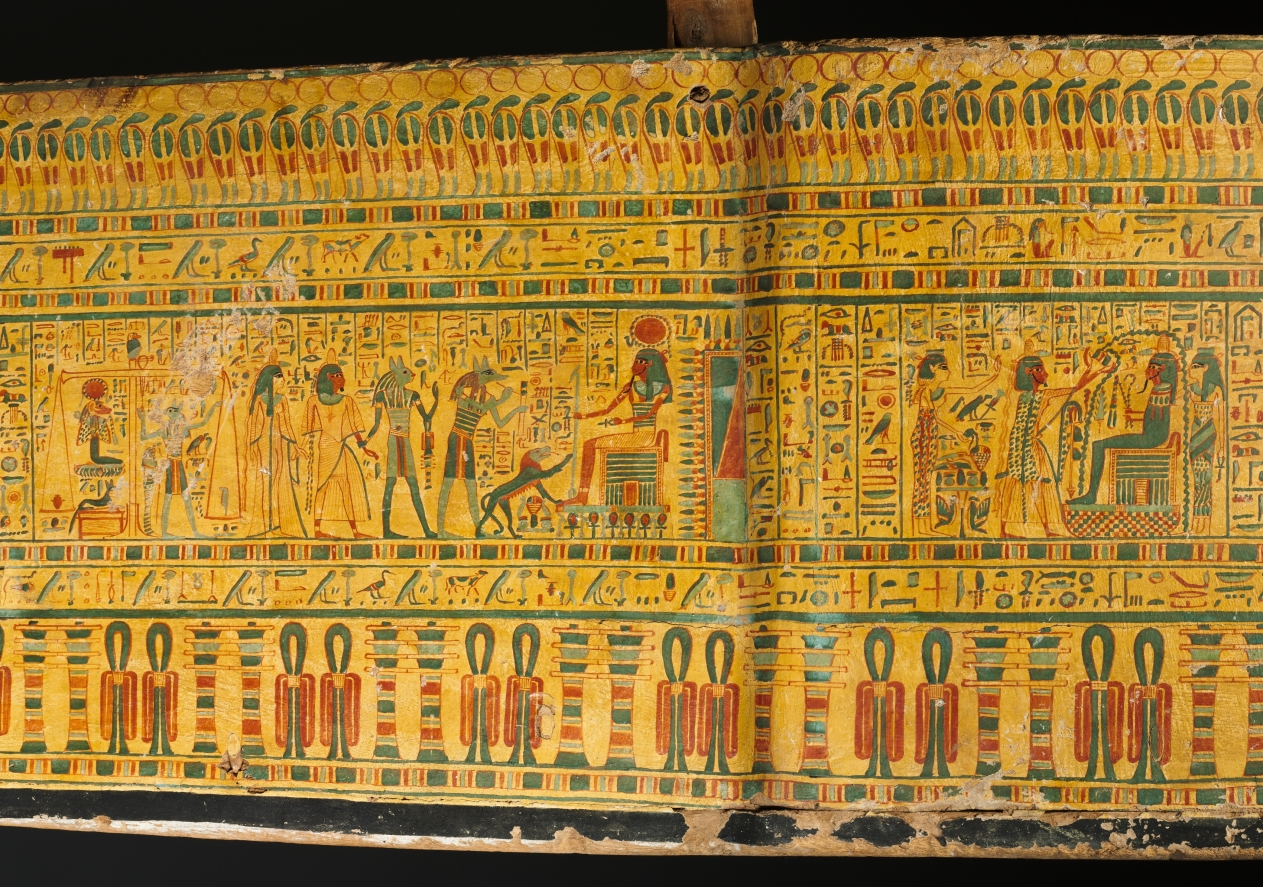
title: Coffin of Bakenmut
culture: Egypt, Thebes, Third Intermediate (1069–715 BCE), Dynasties 21–22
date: c. 1000–900 BCE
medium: gessoed and painted sycamore fig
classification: Funerary Equipment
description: The coffin of Bakenmut is one of the finest examples of painted wooden coffins made for the priests of Amen and their families at Thebes during Dynasty 21 and early Dynasty 22. The pharaohs of this time were no longer buried in the Valley of the Kings, but instead built tombs in the Delta, far to the north, where they resided. Security was lax in the Theban necropolis. The coffins and funerary goods of the wealthy citizens of Thebes were placed in unmarked and undecorated family tombs cut into the cliffs on the west bank of the Nile. All the care and detail that in more prosperous times were devoted to the decoration of the tomb chapel were now lavished on the elaborately painted coffins. Every available surface is crowded with religious scenes, images of funerary gods and goddesses, protective spells, and magical symbols. The deceased appears mummiform. An elaborate floral collar entirely covers the upper body, exposing only the separately attached hands (now lost). A pair of red "mummy braces" are crossed over the chest, their point of intersection marked by a winged sun disk. The lower body is covered with tiny figures modeled in gesso against a yellow background, which gives the effect of gold inlaid with glass or semiprecious stone. The decoration on the interior features two deified dead kings of Dynasty 18. Although these rulers had lived centuries before, memory of their greatness was still very much alive. The main scene near the top depicts Tuthmosis III, the great military pharaoh, who lived 500 years before Bakenmut. Posed as a mummy, the ruler wears a brilliant feathered garment enfolding him with falcon’s wings. The scene below features back-to-back seated images of Amenhotep I, regarded as the patron of the Theban cemetery and worshiped as a local god there.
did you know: Originally another smaller coffin was placed inside this outer coffin and in that the deceased with a mummy board would have rested.